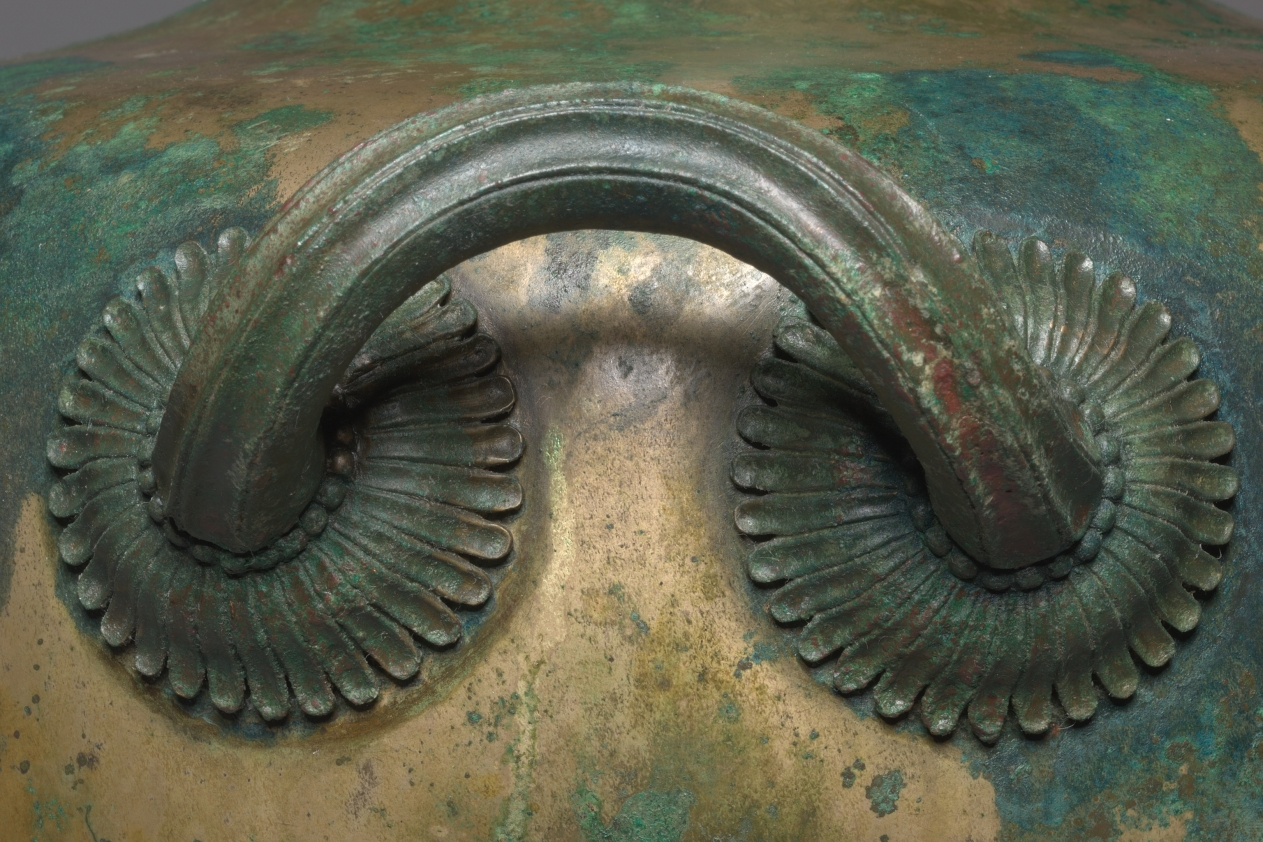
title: Hydria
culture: Greece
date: 425–400 BCE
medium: bronze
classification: Metalwork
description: This vessel gets its name from a shape of earthenware jar that was used to carry water. This bronze hydria was probably used not to carry water but as a cinerary urn (kalpis). The figure on the handle is the mythological siren, a human-headed bird.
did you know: This bronze vessel was likely used as a funerary urn.